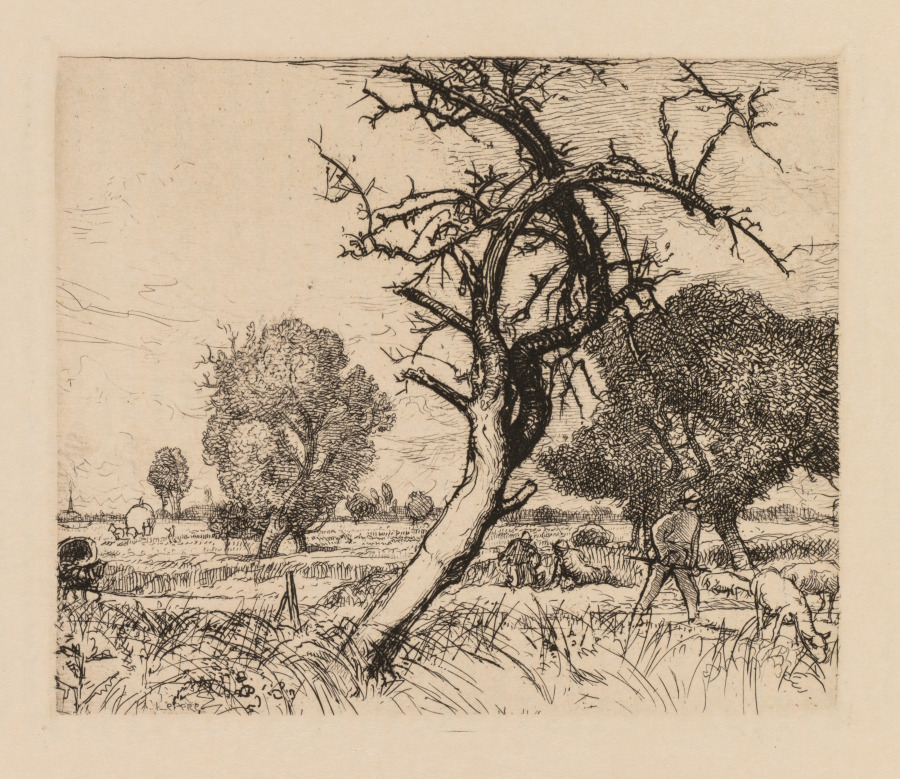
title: Auguste Lepère: Le pommier mort (Picardie)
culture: France, 20th century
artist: Auguste Louis Lepère (French, 1849–1918)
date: 1931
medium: Etching, from bound volume with seven etchings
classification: Bound Volume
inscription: On tissue guard, lower right: 406. LE POMMIER MORT (PICARDIE); on plate, within image, lower right: A Lepere